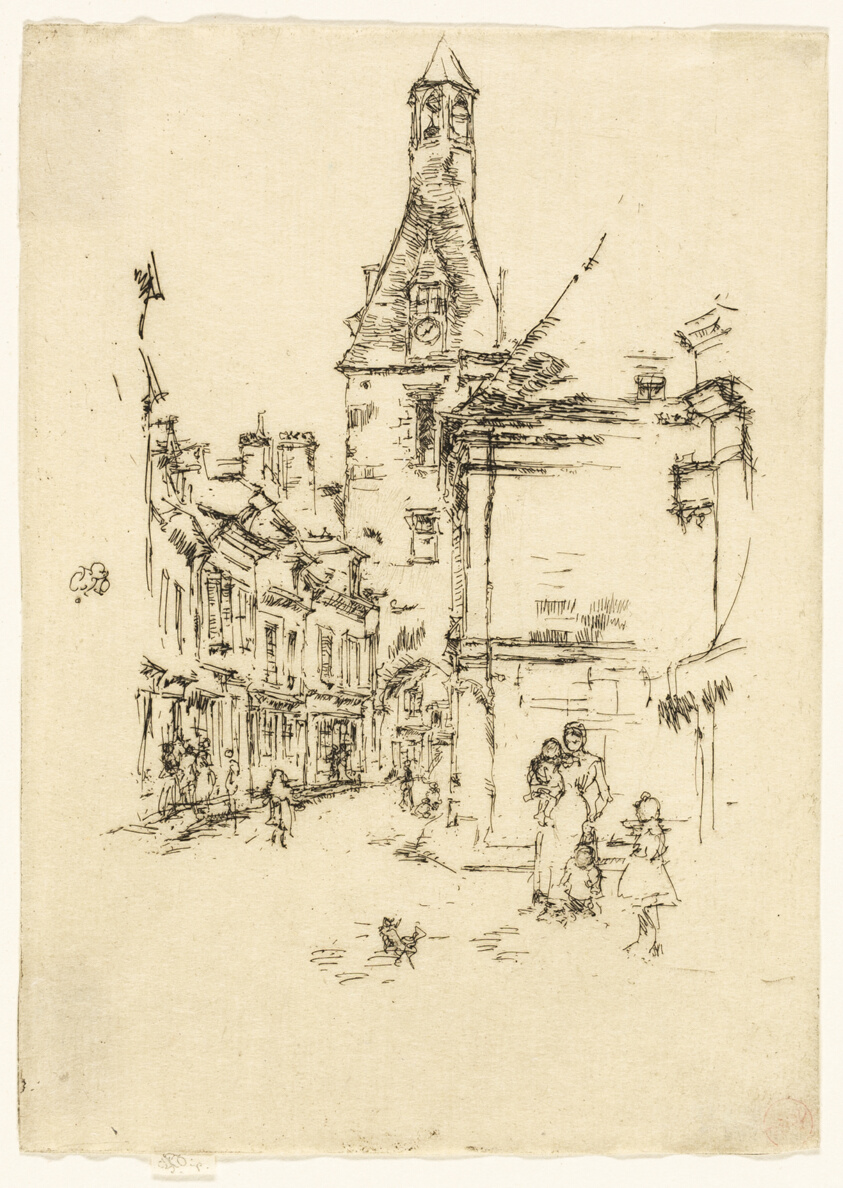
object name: Print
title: The Clock Tower - Amboise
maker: James McNeill Whistler (American, 1834-1903)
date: 1888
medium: Etching and drypoint with foul biting on cream Japanese paper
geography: United States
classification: etching; drypoint; print; prints and drawing; foul biting; paper